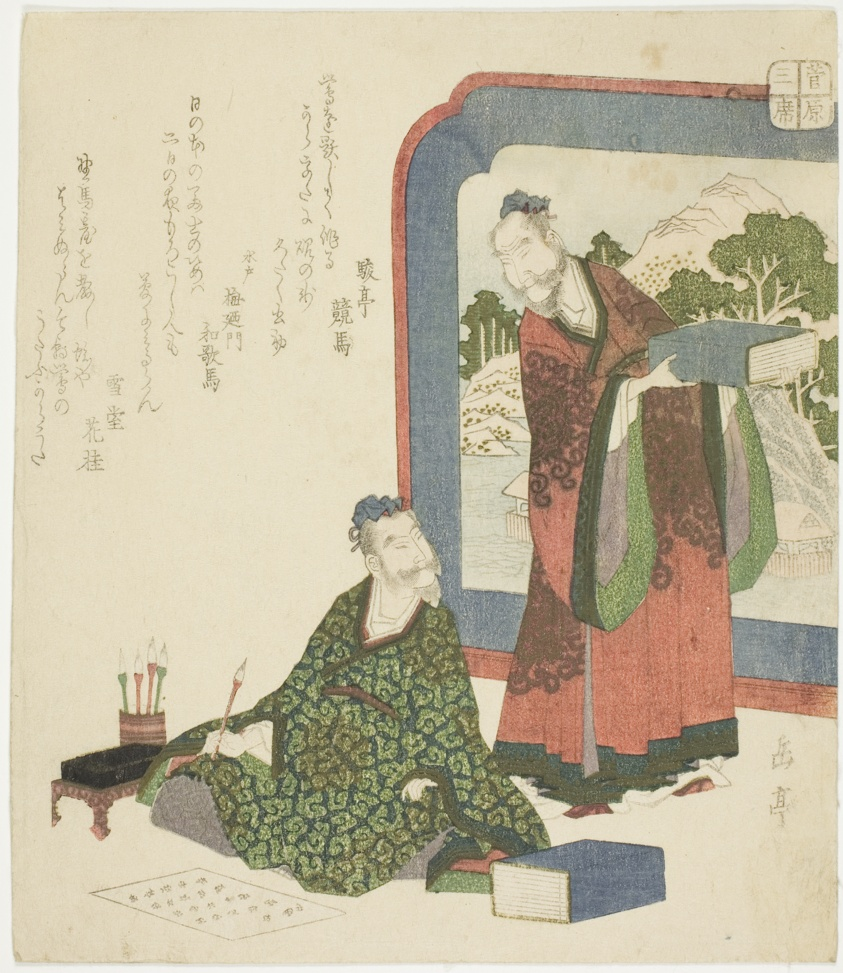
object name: Print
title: Chinese Poetry, from the series "Three Classical Arts for the Sugawara Circle (Sugawara sanseki)"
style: Japanese (culture or style)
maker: Yashima Gakutei (Japanese, 1786 (?)-1868)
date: early 1820s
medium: Color woodblock print; shikishiban, surimono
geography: Japan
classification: woodblock print; print; asian art